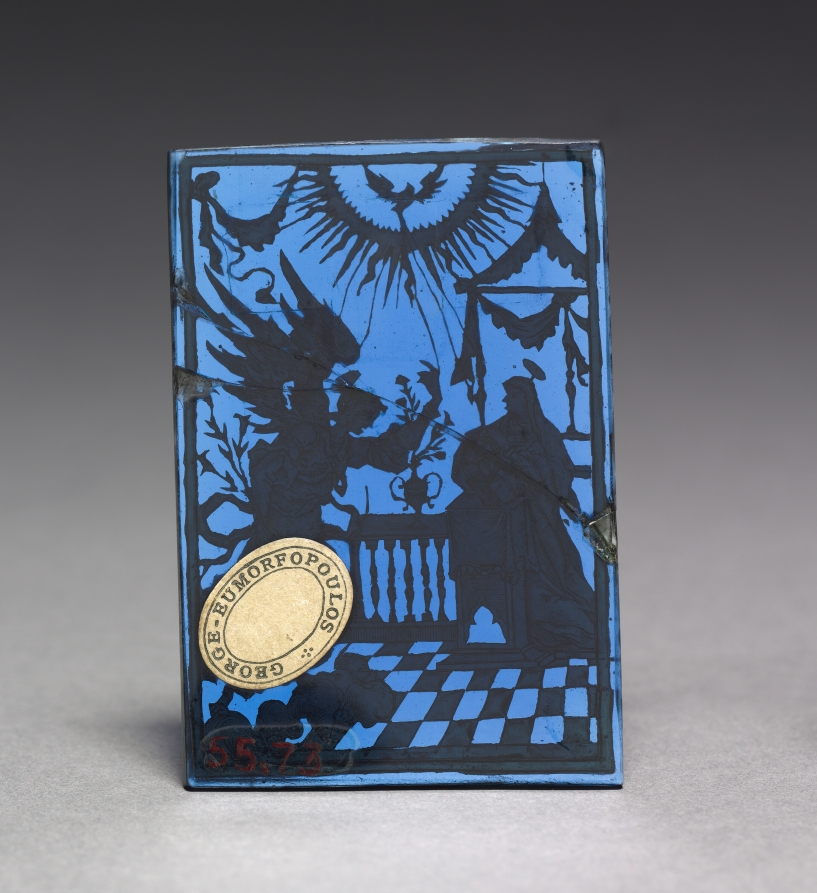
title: The Annunciation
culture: Germany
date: c. 1625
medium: enamel on glass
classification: Glass